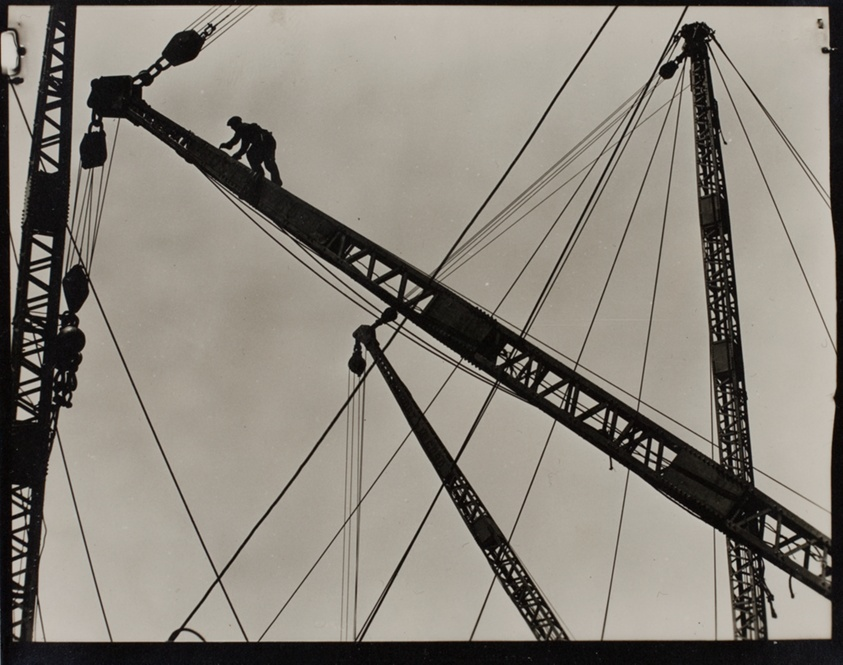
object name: Photograph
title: Derrick Worker on the Empire State Building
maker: Lewis Wickes Hine (American, 1874–1940)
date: 1930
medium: Gelatin silver print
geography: United States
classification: photograph; photography